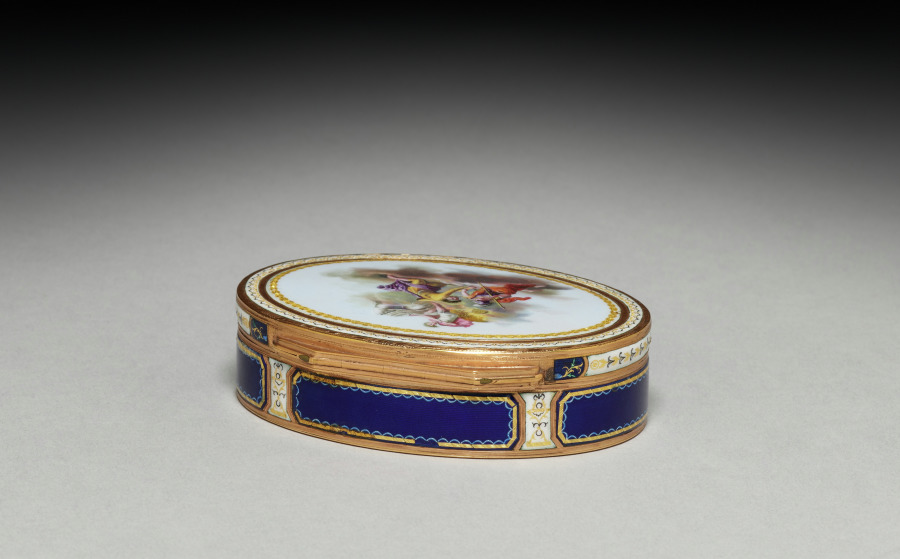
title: Box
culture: Switzerland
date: late 1700s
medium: gold and enamel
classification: Miscellaneous